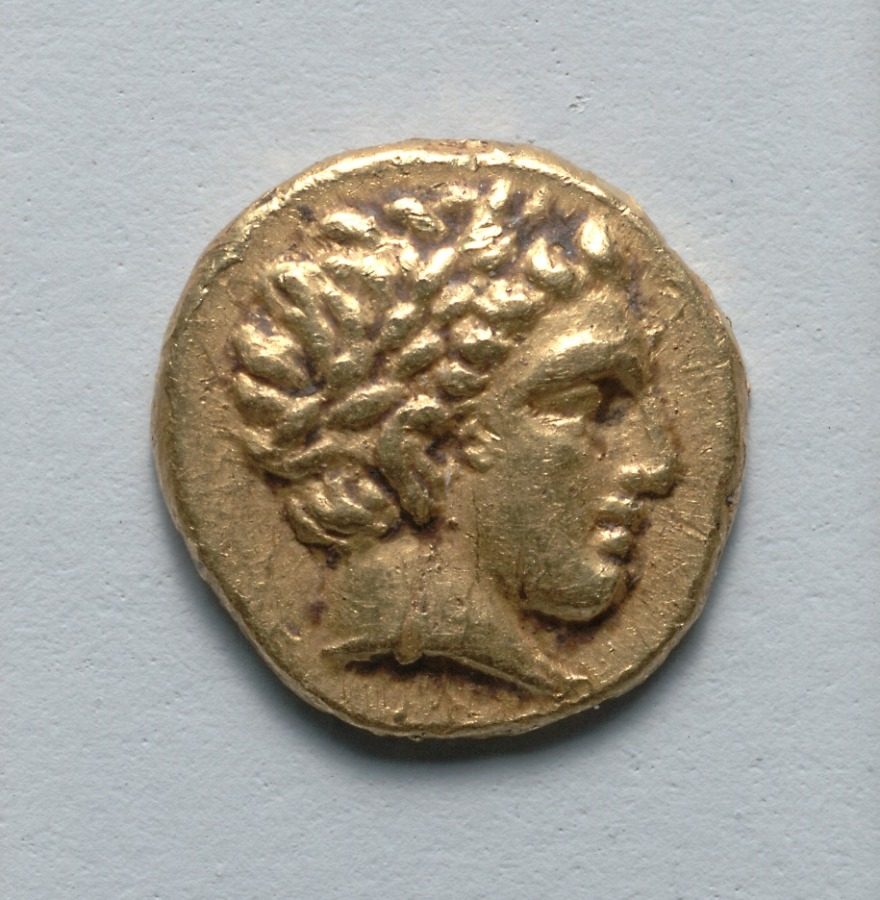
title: Obol: Head of Apollo (obverse); Thunderbolt (reverse)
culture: Greek, Macedonian, minted at Pella (Macedonia), reign of Philip II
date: c. 345–336 BCE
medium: gold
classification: Coins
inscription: ΦΙΛΙΠΠΟΥ